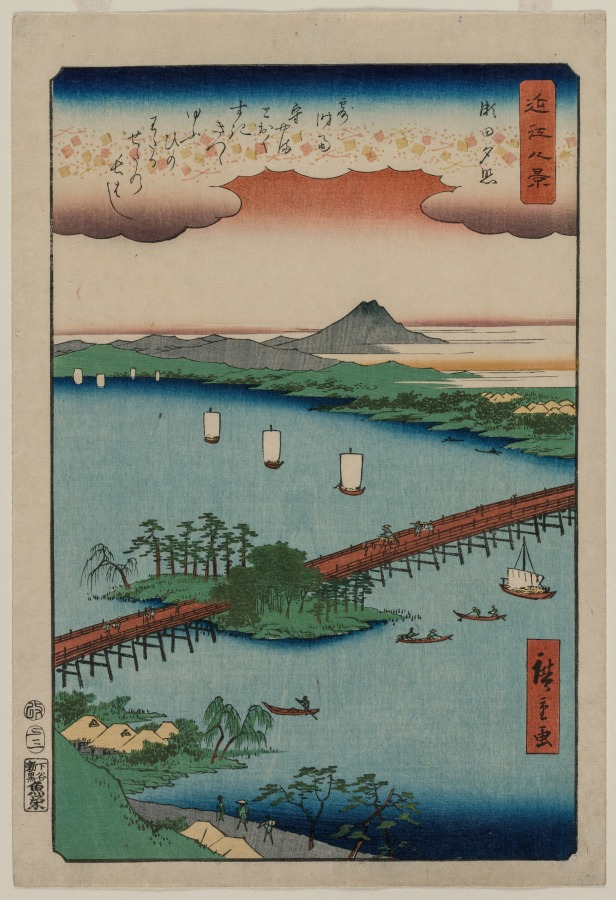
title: Evening Glow at Seta, from the series Eight Views of Ōmi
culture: Japan, Edo period (1615–1868)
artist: Utagawa Hiroshige (Japanese, 1797–1858)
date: 1857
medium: Color woodblock print, ink and color on paper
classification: Print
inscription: Signature: Hiroshige ga. Publisher: Uoya Eikichi, Shitaya Shinkuro. Censorship Seal: aratame.